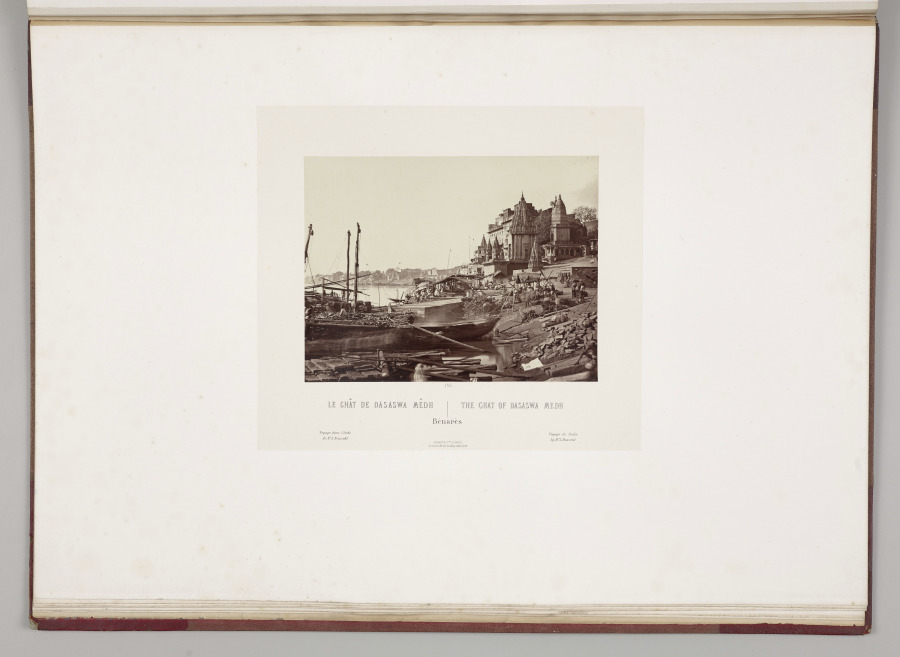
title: The Ghat of Dasaswa Medh, Bénarès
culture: France, 19th century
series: India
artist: Louis-Théophile Marie Rousselet (French, 1845–1929)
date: 1865–68, published 1869–70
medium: Albumen print from glass plate negative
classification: Photograph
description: Concerned that his drawings did not do justice to the splendor of India’s monuments, Rousselet learned photography in India that year, a remarkable accomplishment. He proved to be a talented photographer with a sophisticated sense of composition. The scenes in this volume sweep across sites of Sultanate, Rajput, and Mughal power in northern India, from the sacred Hindu city of Varanasi on the Ganges River to Alwar in Rajasthan. Also included are several scenes of industry and portraits of Indian rulers.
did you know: Louis Rousselet described himself as a “scientific traveler” when he went to India alone at age 18 in 1863 and stayed into 1868.